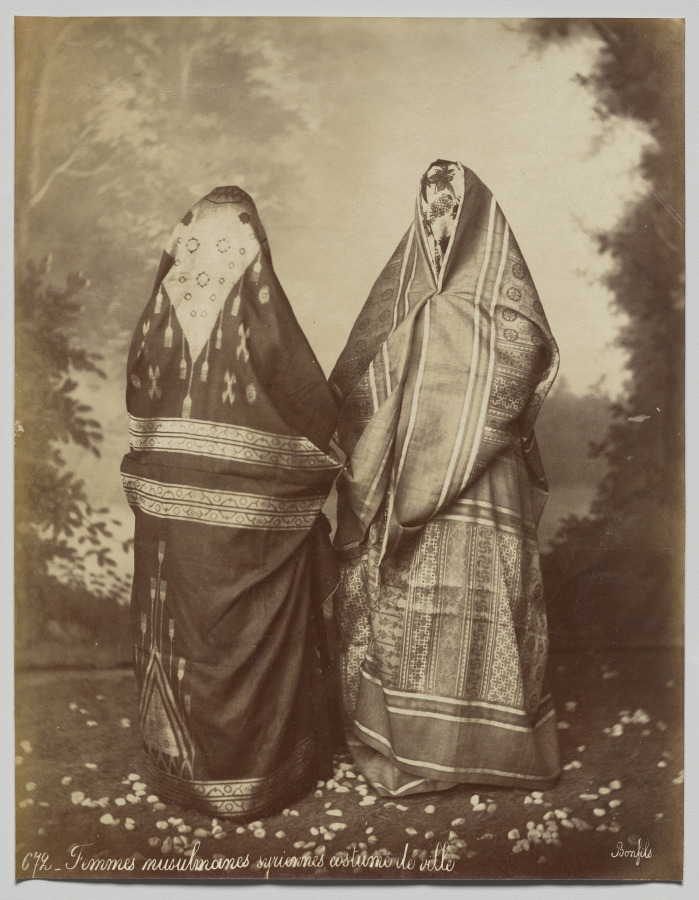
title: Femmes musulmanes Syriennes à Beyrouth, Costume de Ville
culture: France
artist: Félix Bonfils (French, 1831–1885)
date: c. 1867–78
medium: Albumen print from glass plate negative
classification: Photograph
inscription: Imprinted in white on recto of image: "672-Femmes musulmanes syriennes costume de ville"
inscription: Imprinted in white on recto of image, lower right: "Bonfils"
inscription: Written in blue pencil on verso: "24"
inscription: Written in pencil on verso: "672/10"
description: French photographer Félix Bonfils settled with his wife and child in Beirut in 1867 and opened a photography studio which his family continued to operate until 1918. Their offerings included landscapes and cityscapes, portraits, and posed scenes including examples of Middle Eastern dress such as this one, which shows the full-body and face veils worn in public by some, although not all, Muslim women in public in Beirut.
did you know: Many Westerners found the full veils worn by Muslim women in mid-nineteenth-century Beirut both fascinating and disturbing.